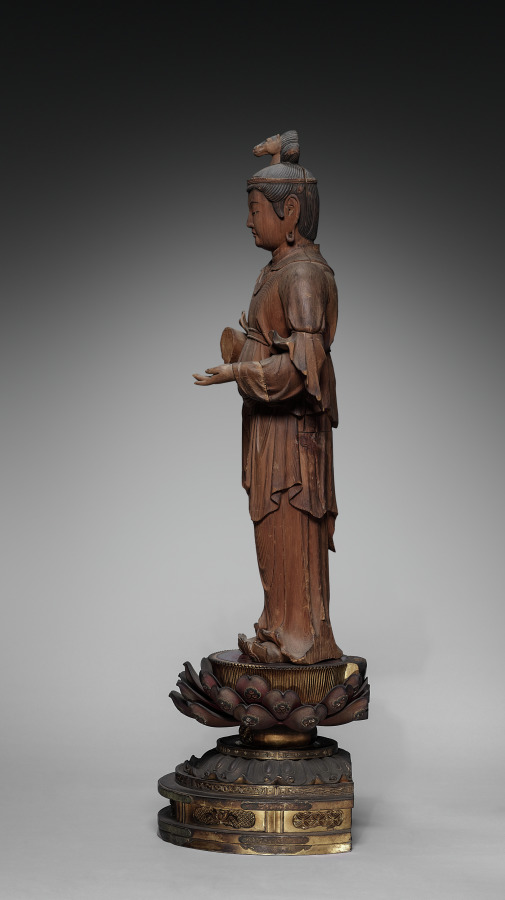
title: Batō (Horse-Headed) Kannon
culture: Japan, Kamakura period (1185–1333)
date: early 1300s, pedestal 1600s–1700s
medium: Wood with traces of color and gold; pedestal: wood with lacquer, color, and gold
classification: Sculpture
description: Batō Kannon, or Hayagriva Avalokiteshvara in Sanskrit, is the “horse-headed” form of the bodhisattva of compassion, who presides over the realm of animals in the Buddhist Six Realms of Transmigration (rebirth). A horse’s head appears in the hair of this sculpture to identify it. Bodhisattvas are beings who, though enlightened, choose to remain within the worlds of existence to help others. The six realms are heaven, hell, human, animal, hungry ghost, and ashura, or fierce supernatural entities.